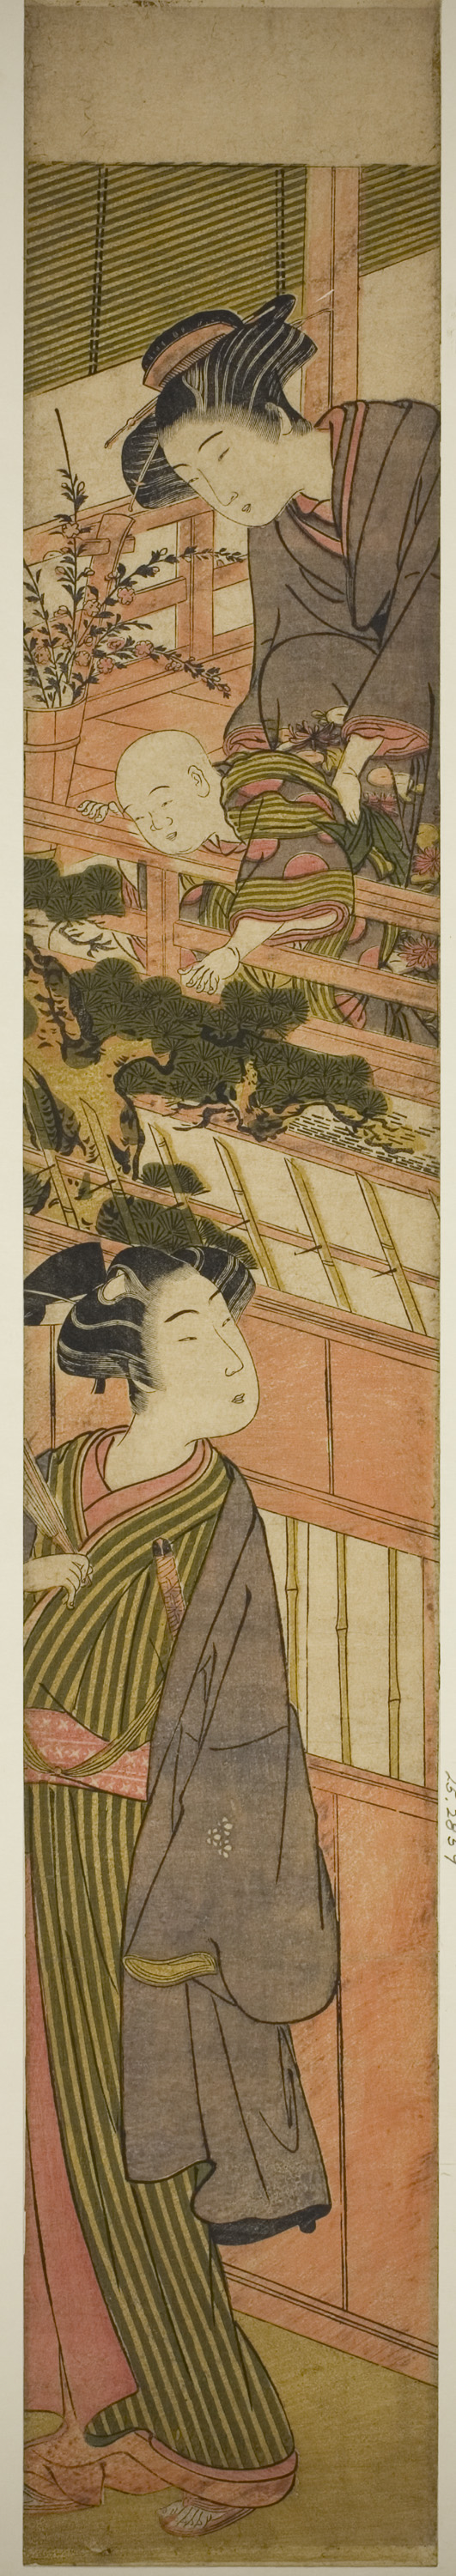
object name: Print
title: Women Holding Boy who is Reaching Out to Young Man Below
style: Japanese (culture or style)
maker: Attributed to Kitao Shigemasa; Japanese, 1739-1820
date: c. 1776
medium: Color woodblock print; hashira-e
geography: Japan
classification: woodblock print; print; asian art